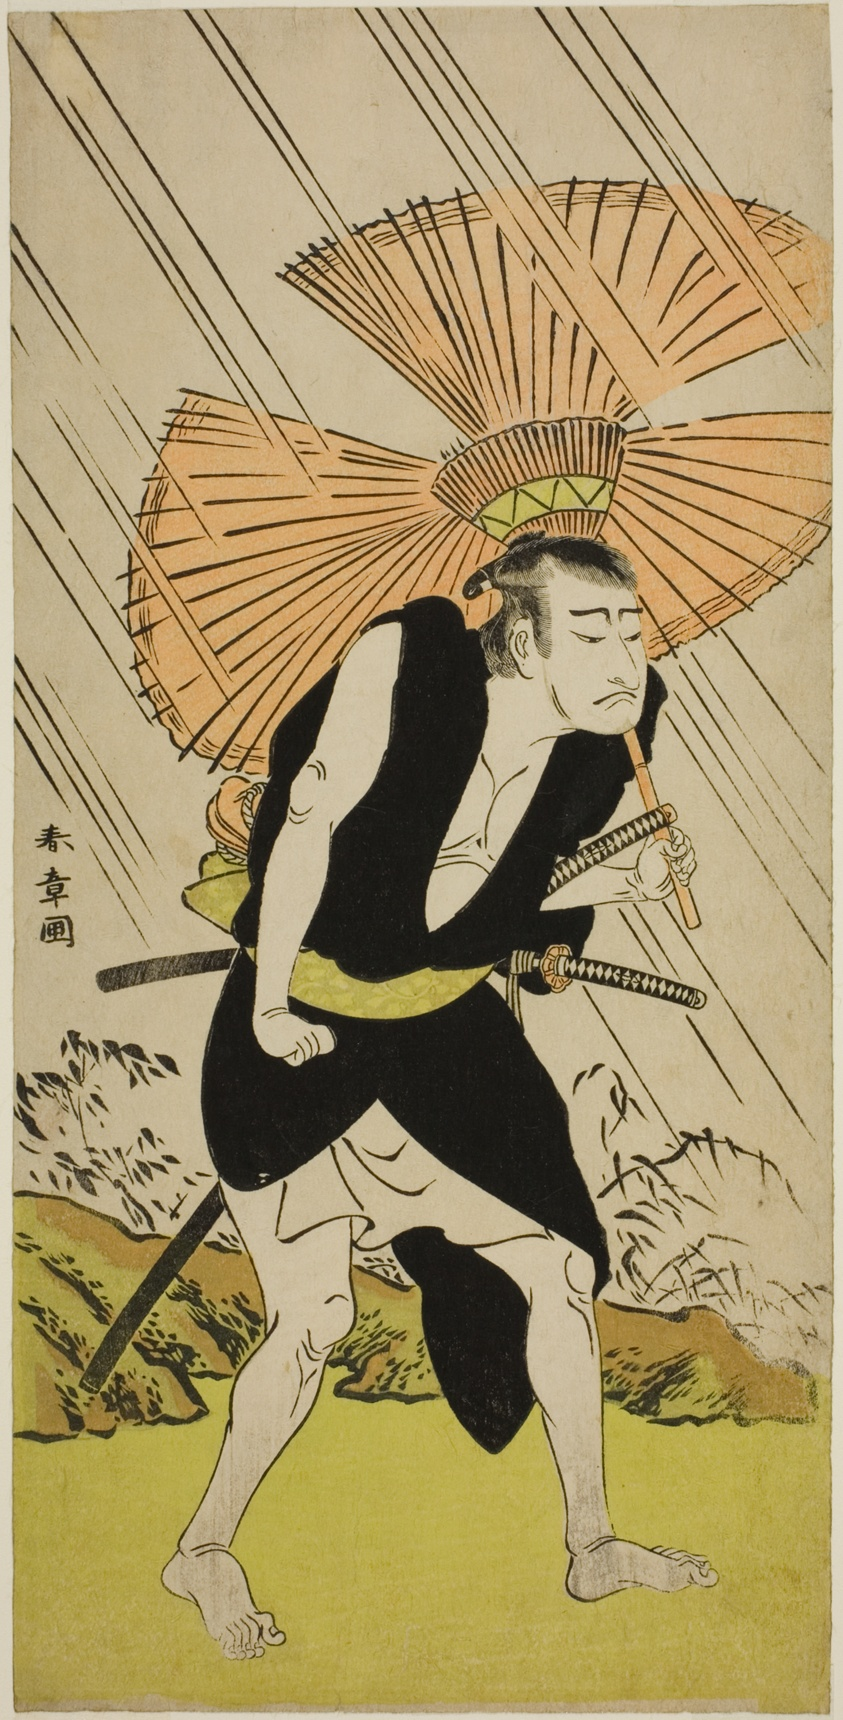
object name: Print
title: The Actor Nakamura Nakazo I as Ono Sadakuro in the Play Kanadehon Chushingura, Performed at the Nakamura Theater in the Fifth Month, 1776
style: Japanese (culture or style)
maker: Katsukawa Shunsho 勝川 春章; Japanese, 1726-1792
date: c. 1776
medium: Color woodblock print; hosoban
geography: Japan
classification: woodblock print; print; asian art